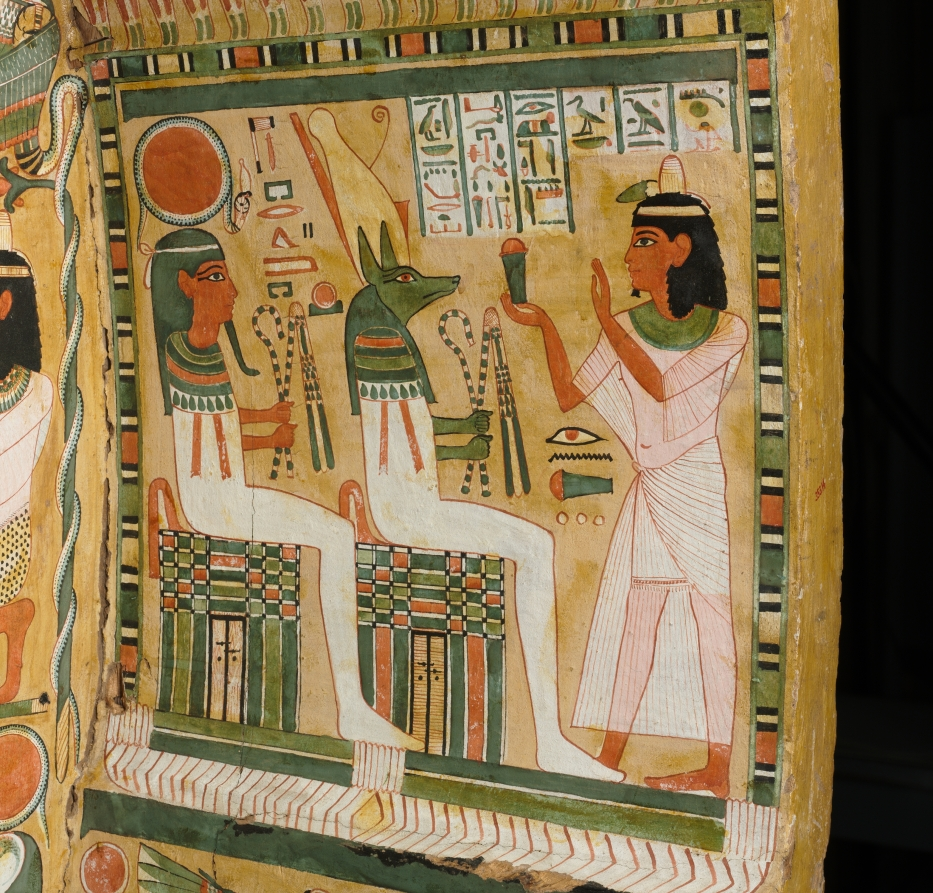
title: Coffin of Bakenmut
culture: Egypt, Thebes, Third Intermediate (1069–715 BCE), Dynasties 21–22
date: c. 1000–900 BCE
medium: gessoed and painted sycamore fig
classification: Funerary Equipment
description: The coffin of Bakenmut is one of the finest examples of painted wooden coffins made for the priests of Amen and their families at Thebes during Dynasty 21 and early Dynasty 22. The pharaohs of this time were no longer buried in the Valley of the Kings, but instead built tombs in the Delta, far to the north, where they resided. Security was lax in the Theban necropolis. The coffins and funerary goods of the wealthy citizens of Thebes were placed in unmarked and undecorated family tombs cut into the cliffs on the west bank of the Nile. All the care and detail that in more prosperous times were devoted to the decoration of the tomb chapel were now lavished on the elaborately painted coffins. Every available surface is crowded with religious scenes, images of funerary gods and goddesses, protective spells, and magical symbols. The deceased appears mummiform. An elaborate floral collar entirely covers the upper body, exposing only the separately attached hands (now lost). A pair of red "mummy braces" are crossed over the chest, their point of intersection marked by a winged sun disk. The lower body is covered with tiny figures modeled in gesso against a yellow background, which gives the effect of gold inlaid with glass or semiprecious stone. The decoration on the interior features two deified dead kings of Dynasty 18. Although these rulers had lived centuries before, memory of their greatness was still very much alive. The main scene near the top depicts Tuthmosis III, the great military pharaoh, who lived 500 years before Bakenmut. Posed as a mummy, the ruler wears a brilliant feathered garment enfolding him with falcon’s wings. The scene below features back-to-back seated images of Amenhotep I, regarded as the patron of the Theban cemetery and worshiped as a local god there.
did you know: Originally another smaller coffin was placed inside this outer coffin and in that the deceased with a mummy board would have rested.